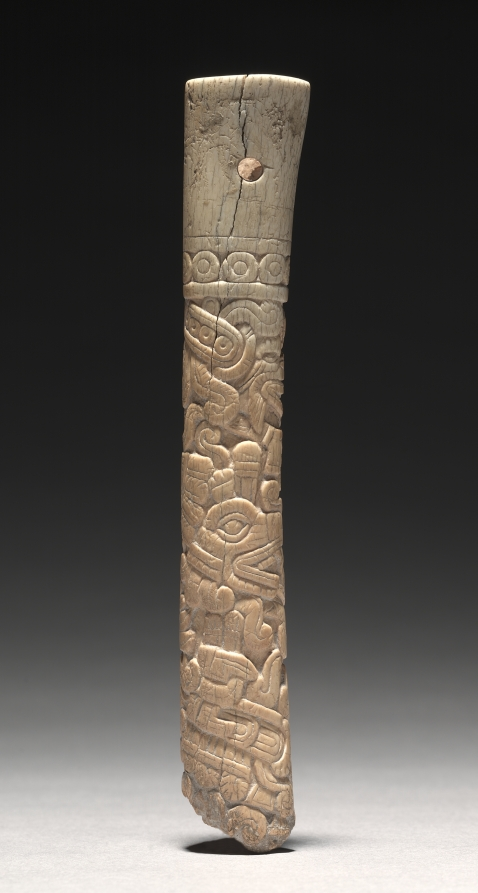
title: Carved Tube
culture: Mexico, Oaxaca, Mixtec, 13th-16th century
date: c. 1200–1519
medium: bone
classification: Jewelry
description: Carved in spiral registers, the ornamentation on this bone tube resembles Mixtec painting, both in codices (screenfold books) and architectural murals.